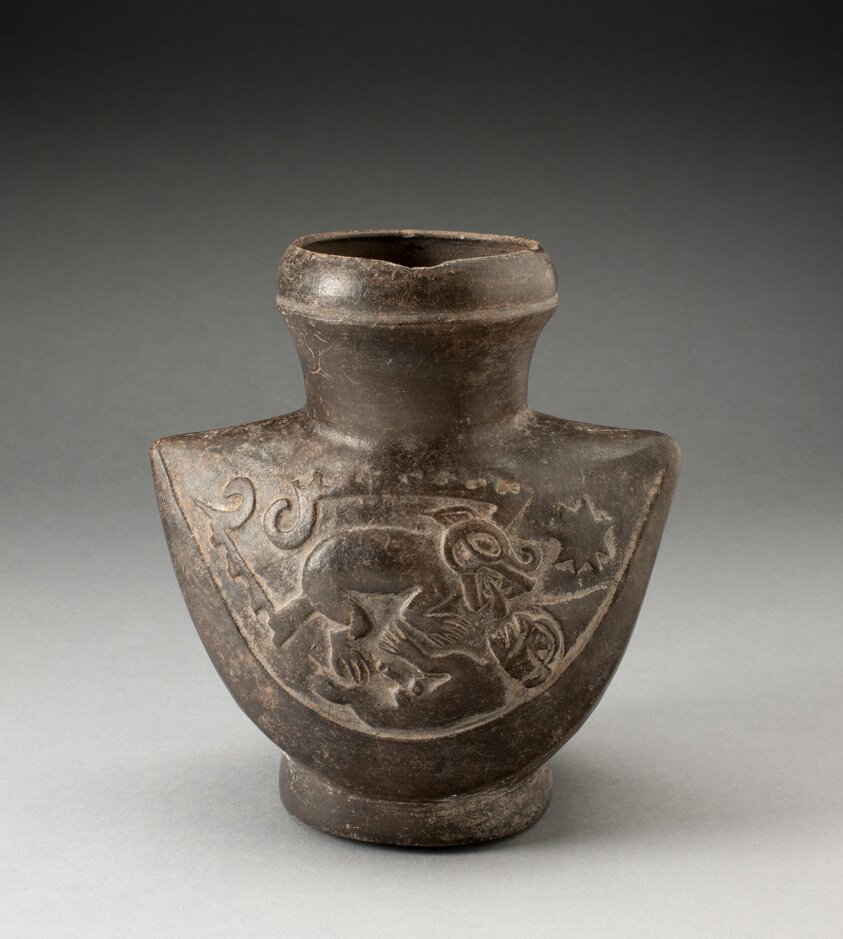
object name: Vessel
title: Wide-Mouthed Jar with Raised Motif of a Man Attacked by a Feline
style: moche, mochica, early intermediate period, Pre-Columbian, americas, Arts of the Americas, andean, andes, south american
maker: Moche (North coast, Peru)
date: 100 BCE–500 CE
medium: Ceramic and pigment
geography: Peruvian North Coast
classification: blackware (black basaltes); art of the americas; earthenware; ceramics; vessel